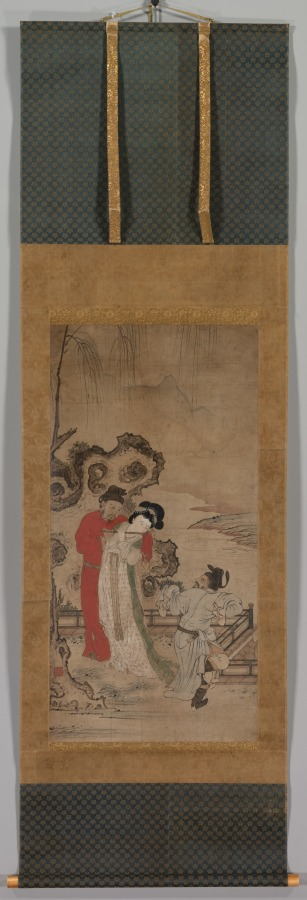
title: Emperor Minghuang Teaching Yang Gueifei to Play the Flute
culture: Japan, Muromachi period (1392–1573)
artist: Choryusai (Japanese)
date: late 1400s–early 1500s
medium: hanging scroll; ink and color on paper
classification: Painting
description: Minghuang, a prominent emperor of Tang (618-906) China and his consort, Yang Gueifei, have inspired many legends, paintings, and poetry in later Chinese culture. Through the study of Chinese literature and the collecting of Chinese paintings, tales of their lives and romance became well-known in Muromachi Japan.